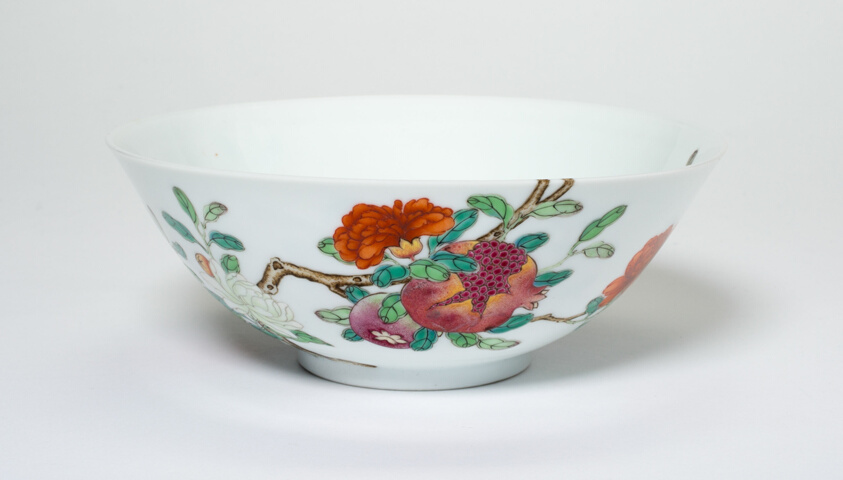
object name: Vessel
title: Bowl with Fruiting and Flowering Pomegranate Sprays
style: Chinese (culture or style)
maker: China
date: Qing dynasty (1644–1911), Qianlong reign mark and period (1736–1795)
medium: Porcelain painted in overglaze enamels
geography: China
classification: bowl; porcelain; dish (vessel); ceramics; asian art; vessel